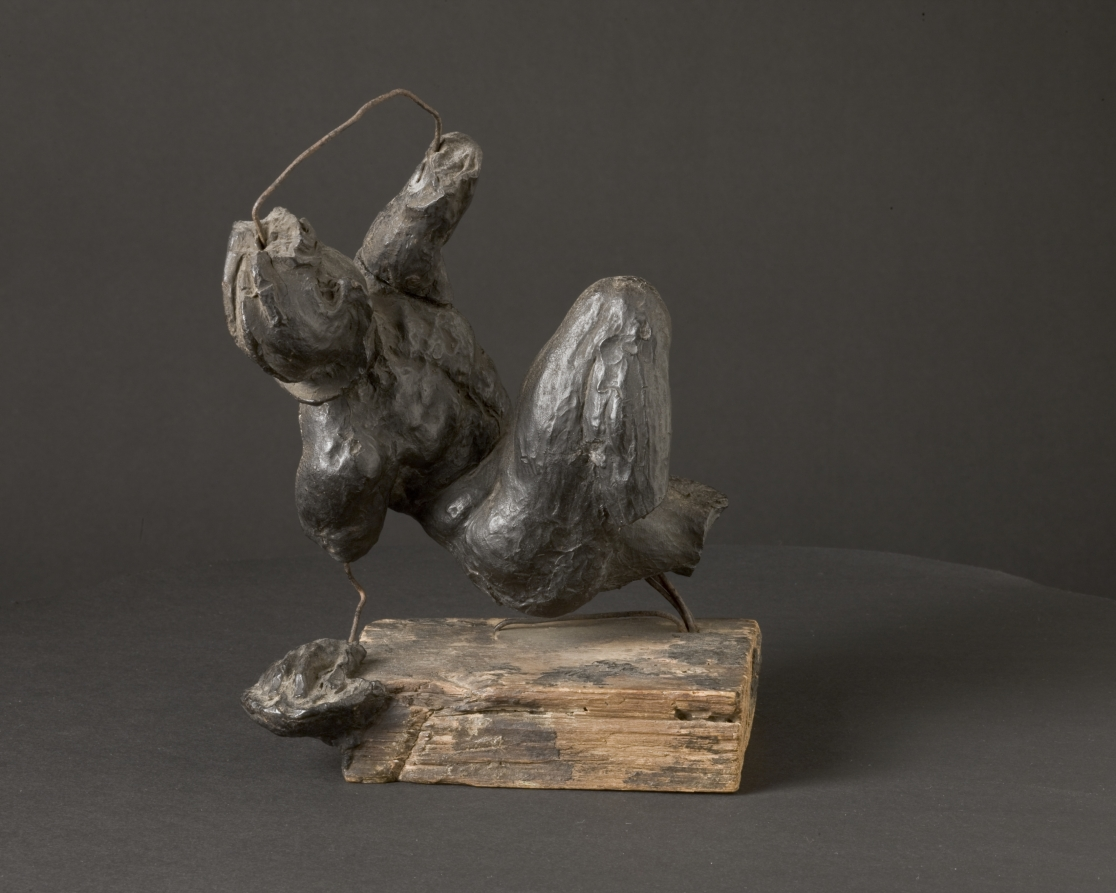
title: Model for a Fallen Warrior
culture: Italy, 16th century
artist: attributed to Giovanni Francesco Rustici (Italian, 1474–1554)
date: c. 1520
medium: wax on a metal armature, mounted on wood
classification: Sculpture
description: Giorgio Vasari (1511–1574), an influential writer and painter, notes in his biography of his contemporary Rustici, that the artist sculpted terracotta battle scenes of groups of horses "with men on their backs or under them." This wax model may be a study for such a group, showing a contorted, helmeted warrior bracing himself after falling to the ground. The figures for these projects were most likely inspired by those in Leonardo's monumental wall painting depicting the Battle of Anghiari for the Hall of the Five Hundred in the Palazzo Vecchio, Florence. Although the fresco was never completed, its pictorial scheme was well known. Rustici later collaborated with Leonardo, and was undoubtedly aware of the major commission and its dynamic portrayal of war.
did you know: Sixteenth-century sculptors often sketched their ideas in three dimensions using wax, clay, or stucco.